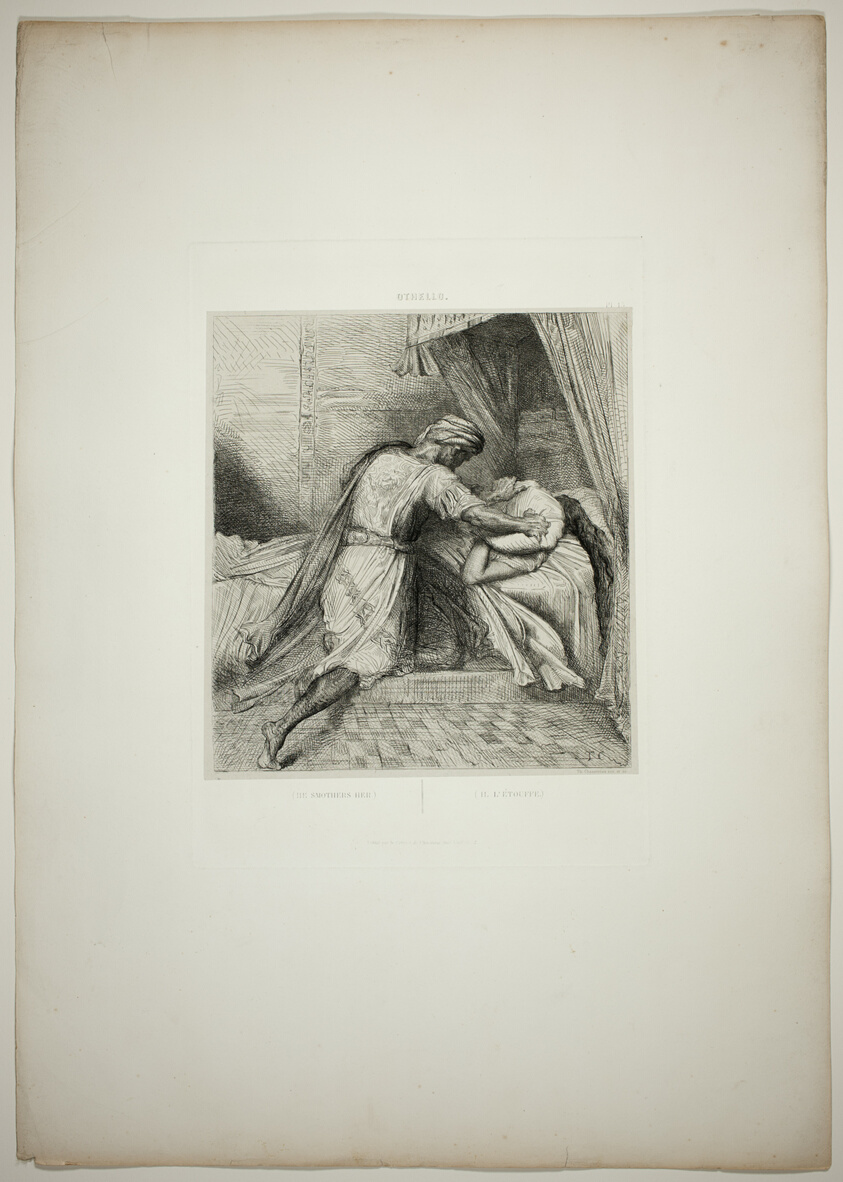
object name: Print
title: He Smothers Her, plate thirteen from Othello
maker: Théodore Chassériau (French, 1819-1856)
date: 1844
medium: Etching, engraving, roulette, and drypoint on paper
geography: France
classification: etching; print; prints and drawing